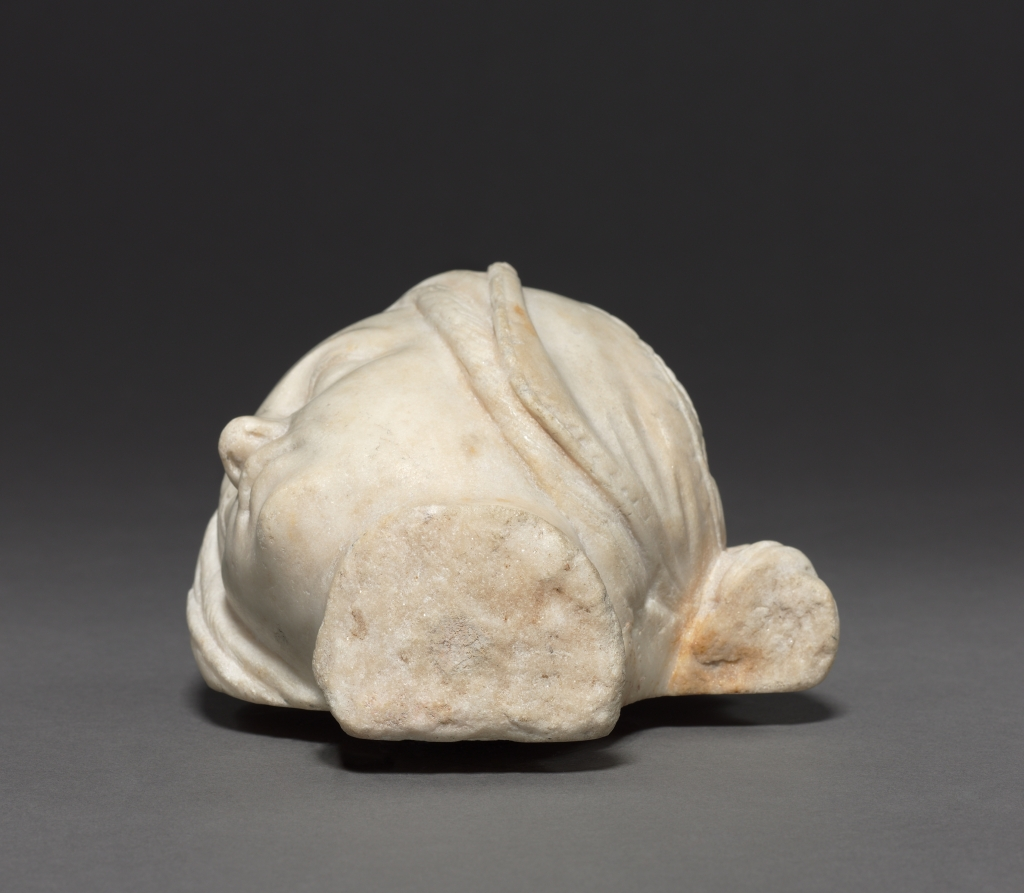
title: Head of a Woman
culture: France, 15th century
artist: circle of Michel Colombe (French, c. 1430–c. 1513)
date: c. 1500–1525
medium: marble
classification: Sculpture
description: The original context and function of these two marble heads are unknown. They are presumed to have been part of a relief sculpture from a château, perhaps in the Loire region, or else from a tomb sculpture. Their style is reminiscent of sculptures produced by Michel Colombe, a prominent sculptor active in the Loire Valley in the service of aristocratic and royal patrons, and may have been carved by a close follower or member of his workshop.